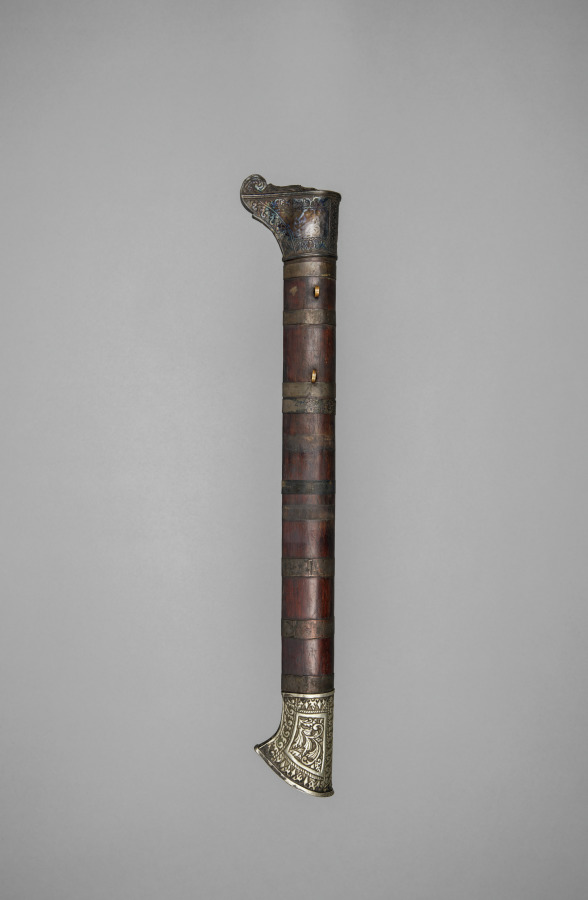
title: Scabbard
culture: Indonesia, Sulawesi (Celebes)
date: before 1918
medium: metal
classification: Arms and Armor